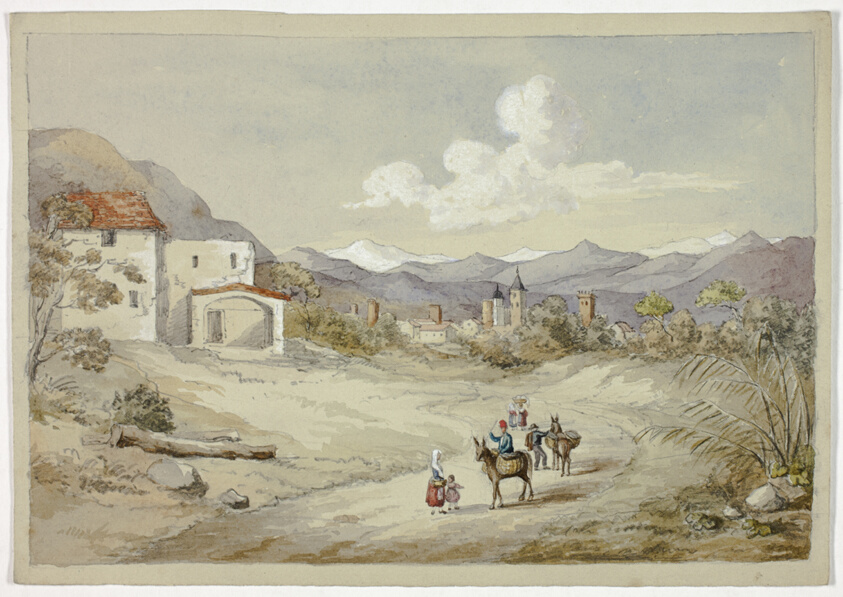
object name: Drawing and Watercolor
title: Albenga on the Corniche (Costal) Road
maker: Elizabeth Murray (English, c. 1815-1882)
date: November 6, 1841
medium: Watercolor and white gouache over graphite on gray wove paper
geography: England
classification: watercolor; drawings (visual works); prints and drawing